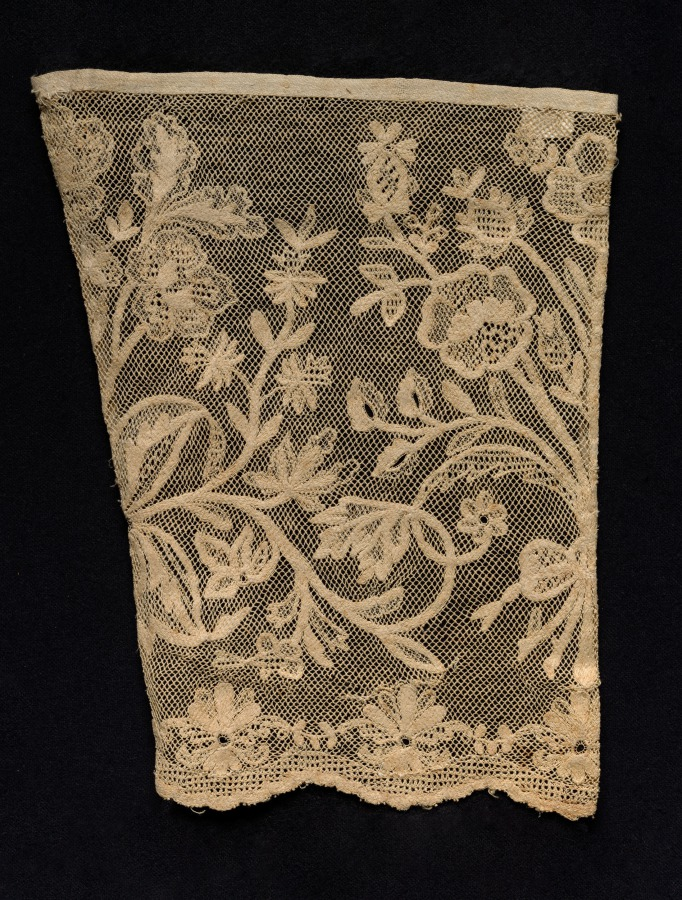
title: Cuff with Floral Vines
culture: Unassigned, 1800s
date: 1800s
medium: Bleached linen (est.): needle lace, filet/lacis (knotted ground and darned in one direction)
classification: Lace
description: In this lace cuff (one of a set, see 1936.225), scrolling vines with budding flowers emerge from a tied bow, creating a stylized bouquet. A scrolling vine with budding vegetation or a tendril motif is a recurring pattern in needle lace. The frequent use of the motif, adapted in lace from different centuries and regions, suggests that it was found in a pattern book.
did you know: From the 15th century, lace cuffs were among the most popular ways to wear and display this costly textile.